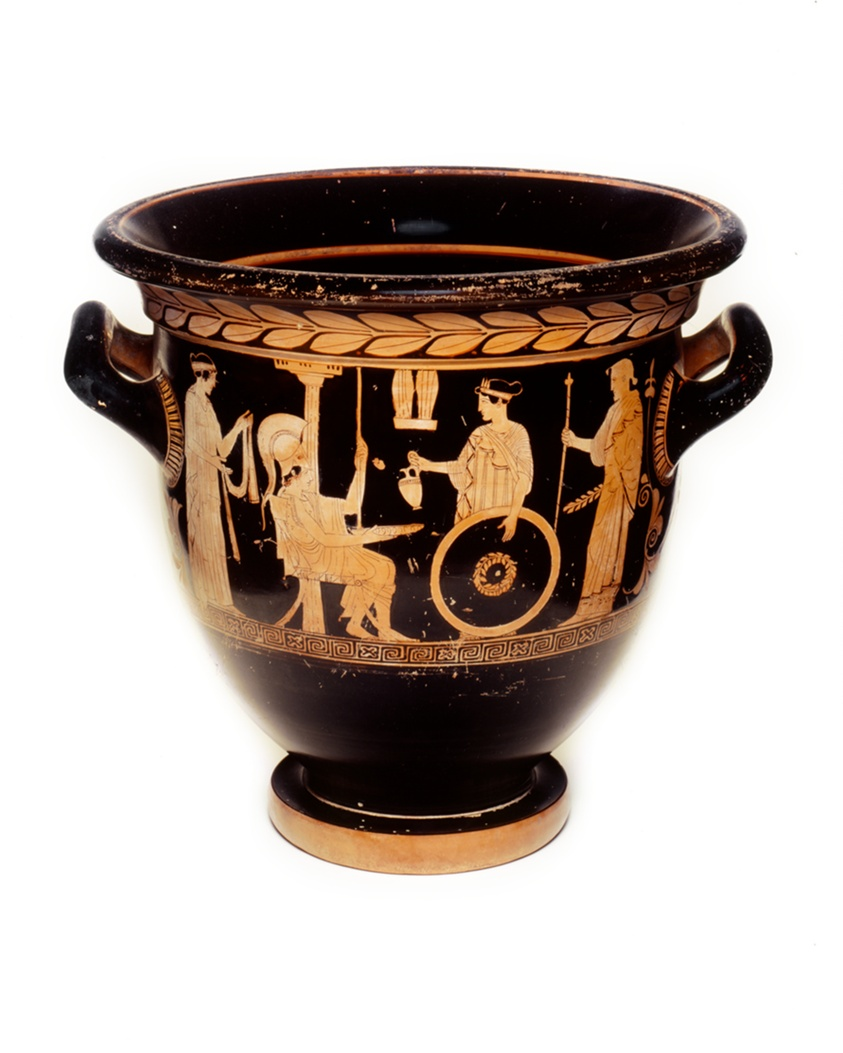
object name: Vessel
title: Bell Krater (Mixing Bowl)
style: high classical, Classical, attic, red-figure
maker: Manner of the Niobid Painter; Greek; Athens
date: about 450 BCE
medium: terracotta, red-figure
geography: Athens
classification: vessel; earthenware; ceramics; ancient art